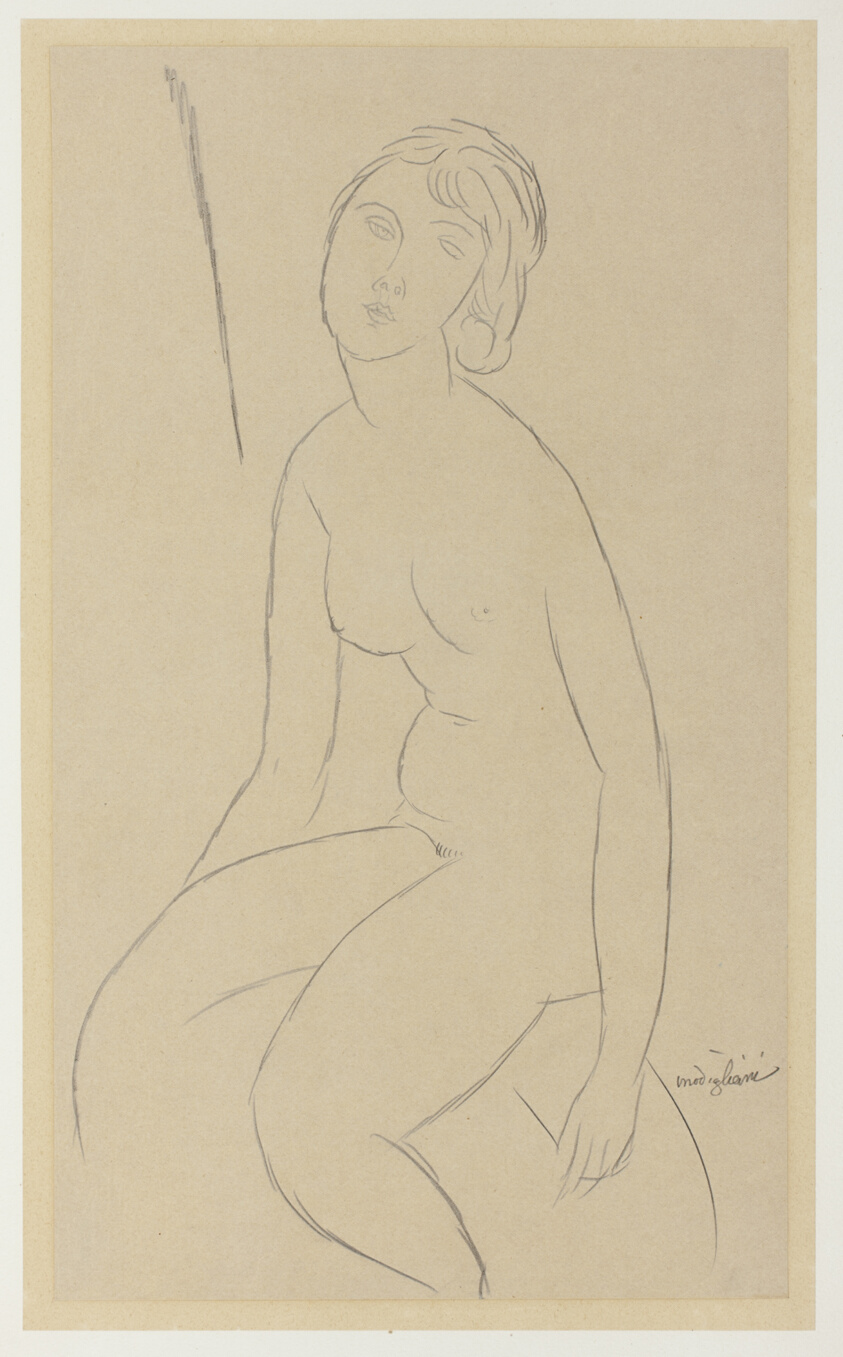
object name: Drawing and Watercolor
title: Seated Nude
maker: Amedeo Modigliani (Italian, 1884-1920)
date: 1918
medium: Graphite on tan wove paper, laid down on tan wove paper, laid down on off-white wove paper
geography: Italy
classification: graphite; drawings (visual works); prints and drawing